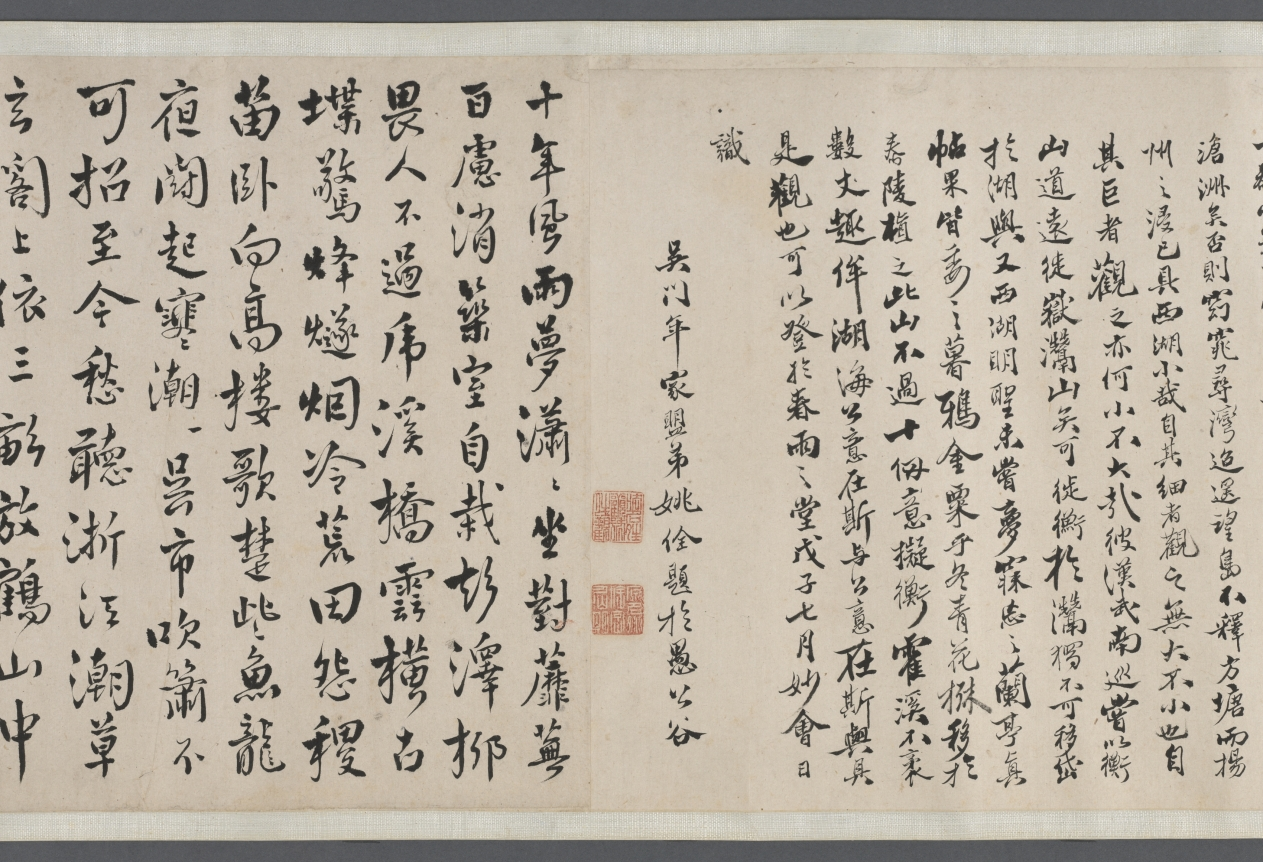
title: Spring Rain Thatched Hut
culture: China, Qing dynasty (1644-1911)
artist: Wang Jianzhang (Chinese, active 1621–1662)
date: 1650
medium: handscroll, ink on paper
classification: Drawing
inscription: Title by Wu Zhiying 吳芝瑛 (1868–1933), dated 1910.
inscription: 春雨草堂圖。庚寅仲春，為紫玄社兄畫於若耶溪上。 仲初王建章。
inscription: 12 colophons by Gong Weiliu’s 宮偉鏐 (1611–1680) contemporaries: Fang Gongqian 方拱乾 (1596–1667, jinshi of 1628); Jiang Cai 姜埰 (1607–1673); Liang Yizhang 梁以樟 (1608–1665); Du Shaokai 杜紹凱 (also named Du Jie 杜岕, 1617–after 1689), dated 1648; Zhao Kaixin 趙開心 (d. 1663), dated 1647; Zhao Erbian 趙而忭 (d. 1658); Yu Yaoguang 余耀光, dated 1649; Yao Quan 姚佺, dated 1648; Chen Taisun 陳台孫 (b. 1611, jinshi of 1640); (Monk) Shao 韶; Du Zhujin 杜祝進; and Tang Shi 唐時.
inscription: 此研田莊居士王建章為先太史紫元公所作春雨草堂圖也。居士字仲初，明崇禎間人，與先太史及惲香山相友善。喜畫佛像，自謂不讓李公麟。山水祖述董源，筆力雄健，有不可羈勒之概。香山稱其墨有五采，非世人所知。然性廉重，非同志不輕落筆，人得其寸圖尺縑，必相與忻賞，如獲蜼彝兕敦，非人世間物也！見先太史筆記，此圖寫雨景，而氣韻生動，勃勃於不能止。每一展覽，覺滿紙雲烟，墨瀋猶濕，如寫吾先人胸中未盡之邱壑也。圖後題詠，多一時名手，想見文采風流之盛。迄今二百餘年，舊德先疇，遺風未沫。吾子孫其永寶之，如與吾先人接謦咳於一堂，為感思之助，其敢作圖畫觀乎！同時香山亦有圖佚去己久，不知異日能為延津之合否。壬申長夏本昂重裝敬識。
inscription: Collectors' seals including: Gong Ben'ang 宮本昂 (1821–1874); Lian Qian 廉泉 (1868–1932); Wu Zhiying 吳芝瑛 (1868–1933)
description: With its striking simplicity, this painting captures the pure serenity of a private garden in the moist atmosphere of a spring morning on a small river. Painted in the style of Ni Zan, Wang Jianzhang dedicated this work to his patron-friend Gong Weiliu (1611-1680). Gong retired from government service after the fall of the Ming dynasty and constructed a garden-retreat at his native home in Taizhou, Jiangsu province. He invited scholars and poets from his literary society to contribute writings of his estate, which are here mounted together with the painting in this scroll.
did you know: Gong Weiliu, the owner of the estate portrayed here, had received his prestigious jinshi degree in 1643, but his official career was thwarted by the collapse of the Ming dynasty the following year.